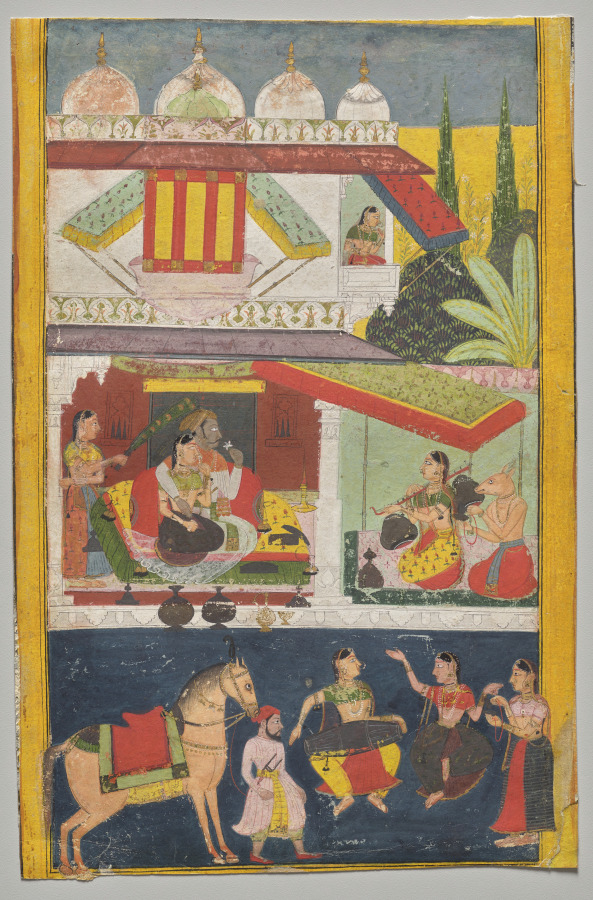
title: Shri Raga, from a Ragamala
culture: Northwestern India, Rajasthan, Rajput Kingdom of Mewar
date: c. 1695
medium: Gum tempera and gold on paper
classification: Painting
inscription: [[verso]] Shri Ragini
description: This painting is from an important series made at a turning point in the history of court painting at the Rajput kingdom of Mewar. For the first time, a royal patron, Amar Singh II (r. 1698–1710), even before his accession to the throne, decided to incorporate Mughal elements into secular art, as seen in the white domed architecture and interest in conveying some sense of spatial depth. Nevertheless, the artist still adheres to the use of horizontal registers and bold planes of color. The codified iconography of Shri Raga involves a royal couple listening to recitations. Shri Raga is described as: "Splendidly enthroned of peerless beauty and lovely as the autumn moon, he sits hearing stories from Narada and Tumburu. By the great sages he is called Shri Raga King." Amar Singh has playfully substituted his own portrait for that of the generic king, and a woman for that of the sage. In music, Shri Raga is associated with the season of autumn and the harvest festivals, here evoked by the dancing female musicians in the lower register.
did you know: The horse-headed musician playing the cymbals is a celestial being (gandharva) famed for his sweet voice.